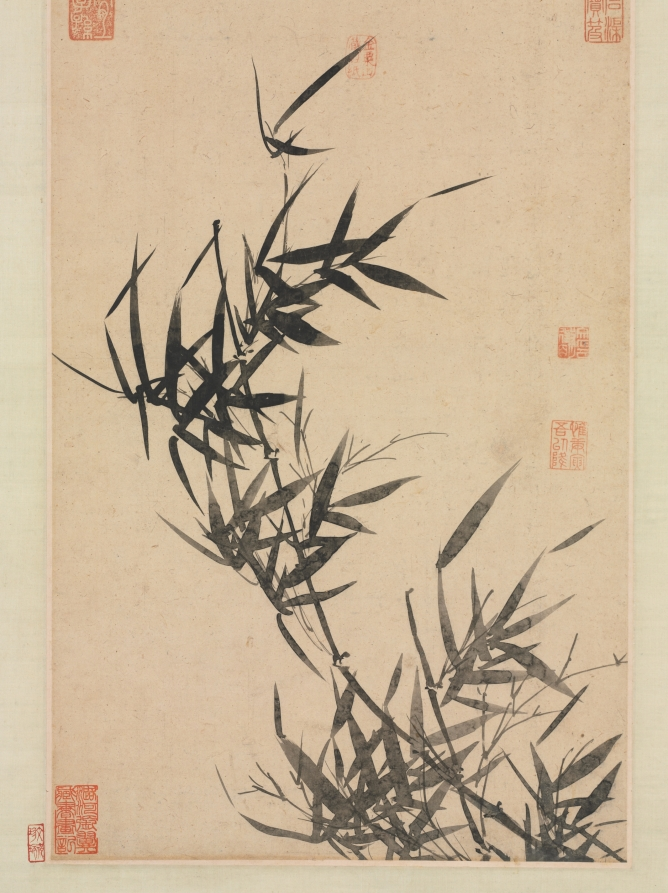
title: Listening to the Bamboo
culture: China, Ming dynasty (1368–1644)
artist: imitator of Wen Zhengming (Chinese, 1470–1559)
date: late 1400s-1500s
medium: hanging scroll, ink on sutra paper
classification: Painting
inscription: Artist's inscription, signature, and 2 seals on the separate sheet of paper above the painting: In the empty studio sitting in deep loneliness;/ Like cool sound sending pure beauty,/ Or pendants swinging in the wind,/ Or a solitary qin suggesting running water./ Where is that sound from?/ The green poles in the courtyard,/ Clear and light like an echo,/ The sound and ears are in tune./ The sound of bamboo now very beautiful;/ My ears are also clear./ Who says the sound is in the bamboo?/ To know it depends on oneself./ A noble person is like a tall bamboo;/ A thin bamboo is like the noble man./ When the sound enters, the mind responds,/ Only one thing but artificially separated./ A bystander searching for the sound,/ But the sound can only be found in silence./ Otherwise I am still I,/ Bamboo is still bamboo./ Even if I live with bamboo every day,/ Still the music will be a thousand miles away./ Look at sound's most primeval source:/ Did it enter a zither or a lute? Composing a poem on Listening to the Bamboo. Written by Zhengming at the Ting yun guan. Wen Zhengming [2 seals] Wen Zhengming yin 文徵明印; Wei geng yin wu yi jiang 惟庚寅吾以降.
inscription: [印] 文徵明印; 惟庚寅吾以降.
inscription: 5 seals of the Qianlong emperor (r. 1736-95)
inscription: [印] 金粟山藏經紙